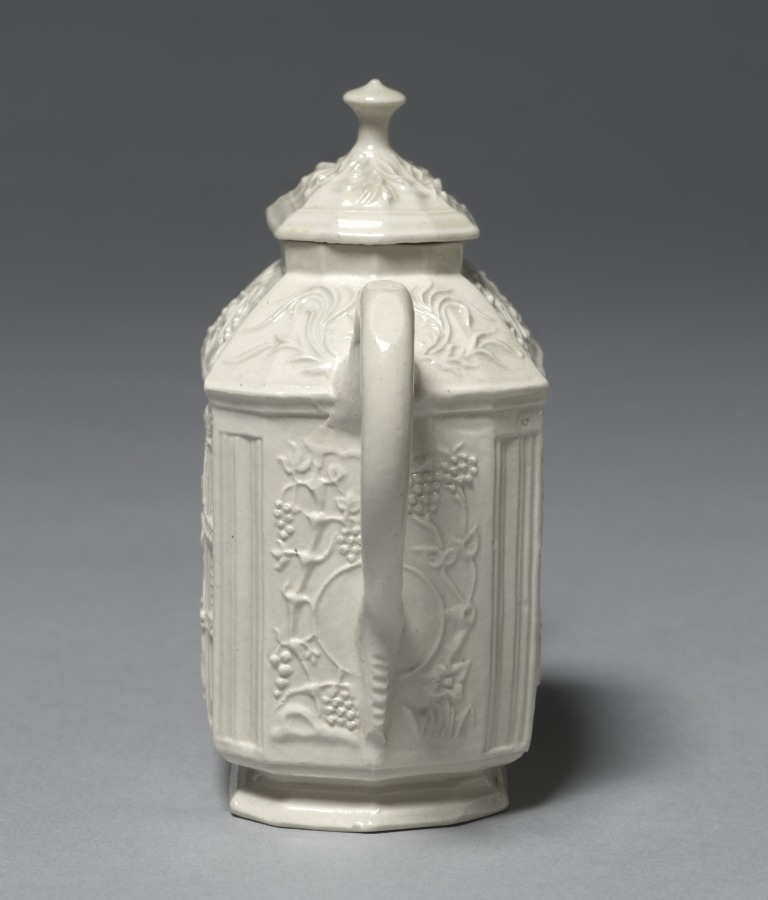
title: Teapot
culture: England, Staffordshire, 18th century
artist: Staffordshire Factory (British)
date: c. 1745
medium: salt-glaze earthenware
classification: Ceramic